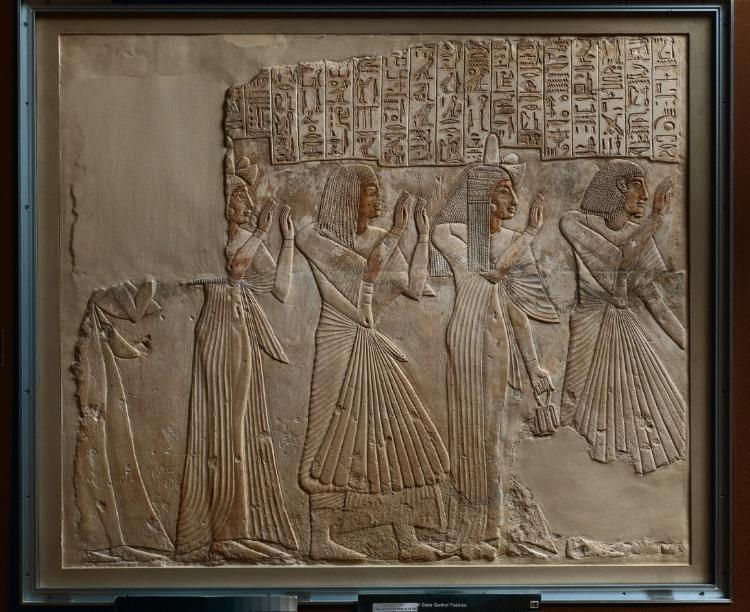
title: Tomb Relief of the Chief Physician Amenhotep and Family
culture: Egypt, Asyut, New Kingdom, (1540–1069 BCE), Dynasty 19, reign of Ramesses II (1279–1213 BCE)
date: c. 1279–1257 BCE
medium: limestone with traces of paint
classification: Sculpture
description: Ancient Egyptian medicine was held in high esteem, and doctors made a good living. In this scene, the chief physician Amenhotep leads his family in prayer. Arms uplifted in worship, they all wear intricately styled wigs and elaborately layered, pleated, billowing linen garments that were the height of fashion during the long and prosperous reign of Ramesses II. The faces have features typical of this period, including a long-nosed profile with small mouths and creases on the neck. Only the upper eyelids were modeled in relief; other details of the eyes were added in black and white paint. Amenhotep’s tomb chapel at Asyut was excavated in 1913–14 by the Egyptian Antiquities Service. Its reliefs are now divided among four cities. The right side of the wall directly adjoining the Cleveland relief is in Zurich, Switzerland. The other sections are in the Toledo Museum of Art and the Egyptian Museum, Berlin, Germany.